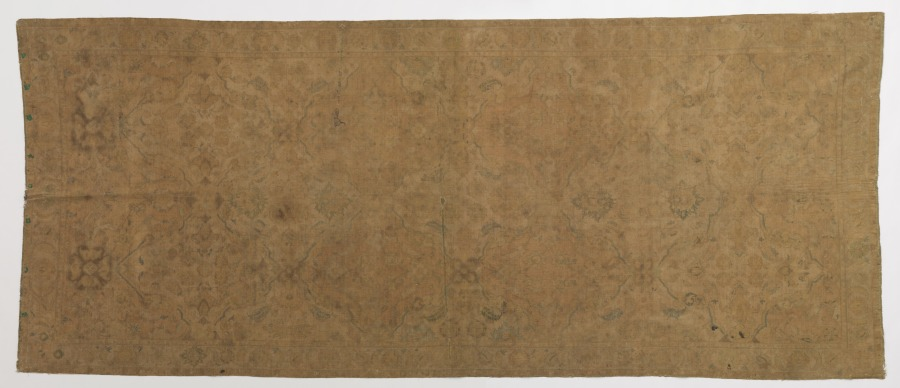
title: Carpet, so-called "Polonaise"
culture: Iran, 17th century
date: 17th century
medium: senna knot: silk, silver and gold filé brocading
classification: Carpet